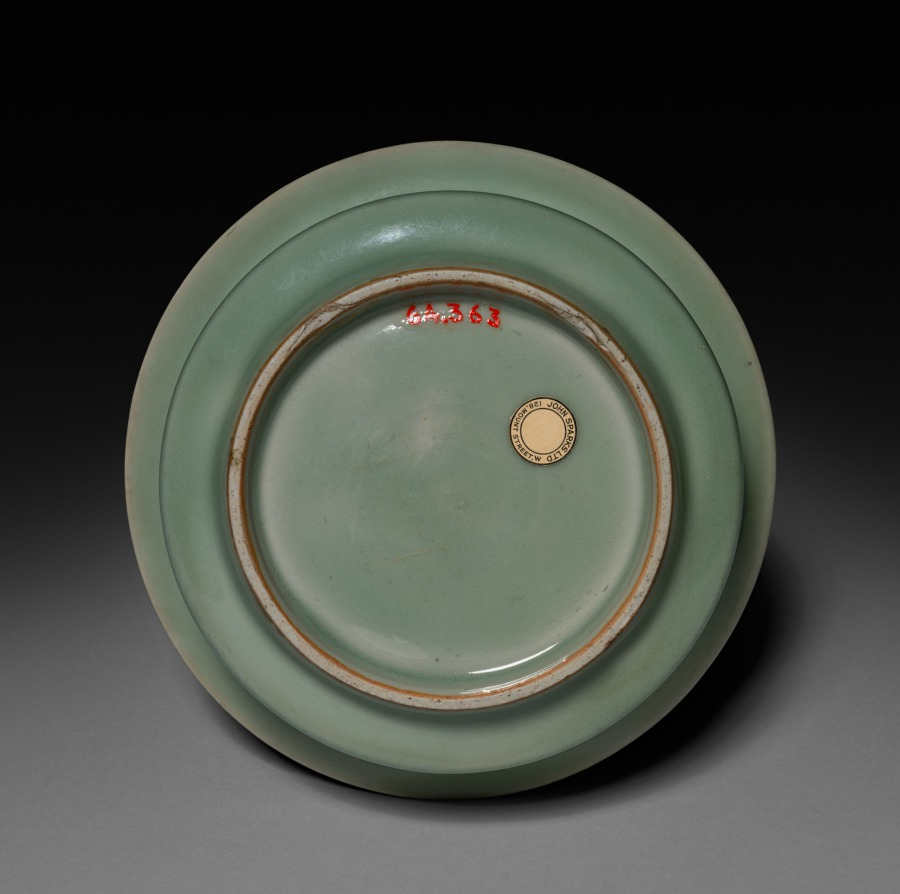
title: Brush Washer: Longquan Ware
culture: China, Southern Song dynasty (1127-1279)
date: 13th Century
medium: glazed porcelain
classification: Ceramic